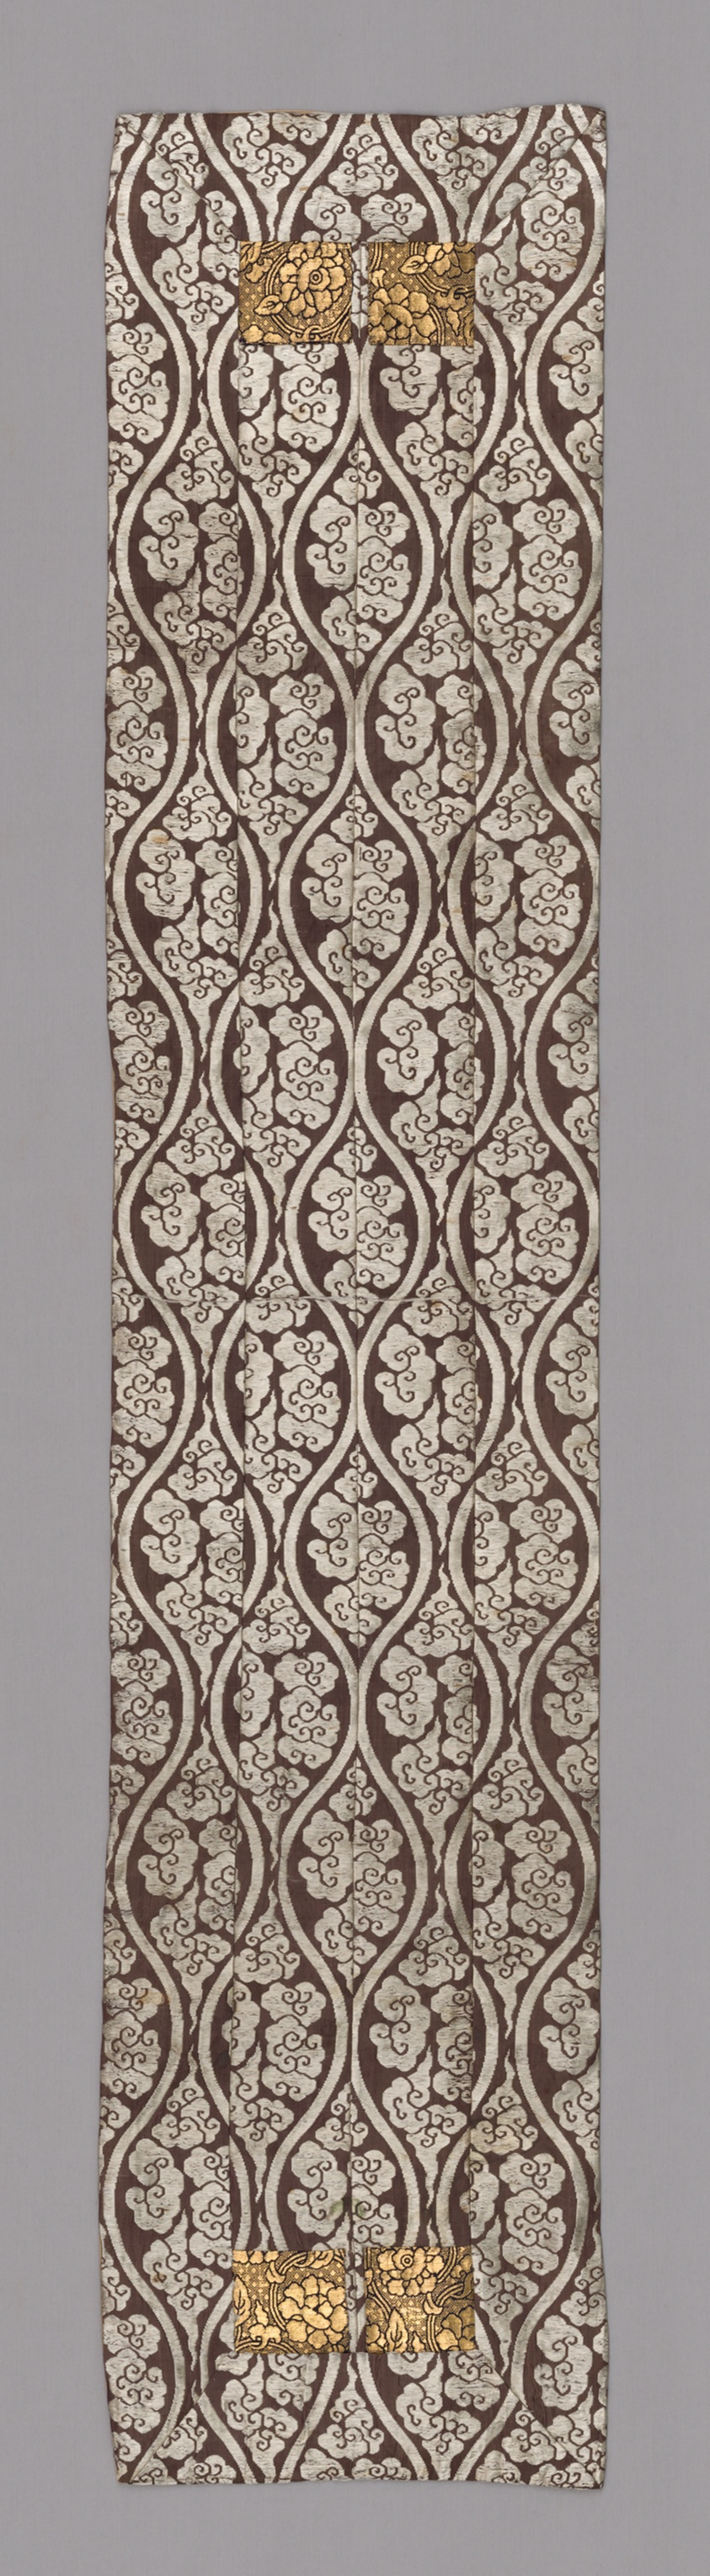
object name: Textile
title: Ôhi (Stole)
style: Japanism, late edo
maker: Japan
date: late Edo period (1789–1868), 1800/68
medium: Heri, jô: silk, warp-float faced 2:1 ‘Z’ twill weave with supplementary patterning wefts; shiten: Silk and gold-leaf-over-lacquered-paper-strip, warp-float faced 2:1 ‘Z’ twill weave with weft-float faced 1:2 ‘Z’ twill interlacings of secondary binding warps and supplementary patterning wefts; lining: silk, predominant warp, weft ribbed, plain weave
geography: Japan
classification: textile; weaving; liturgical - buddhist